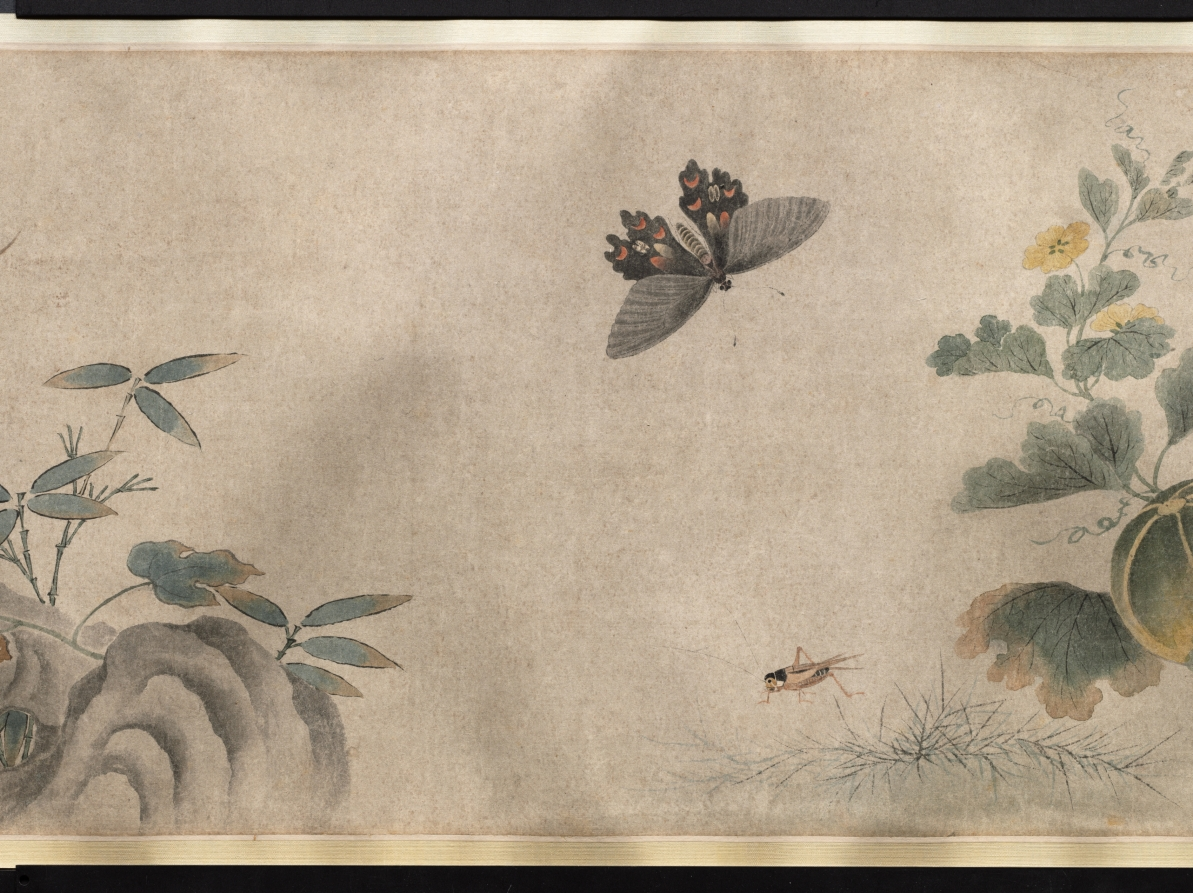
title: Insects and Flowers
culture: China, Qing dynasty (1644-1911) or Republican period (1912-49)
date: c. 1900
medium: Handscroll, ink and color on paper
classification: Painting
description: More than 26 feet long, this scroll presents insects, reptiles, and plants in delicate brushwork and pale colors, referring in style to earlier Southern Song dynasty (1127–1279) bird-and-flower paintings. Upon closer inspection, ants dismember a butterfly and reptiles wait to ambush their prey. An inscription at the end of the painting gives us an idea of its meaning: Attributed to the Qing dynasty scholar Zhang Xigeng (張錫庚, 1801–1861), the inscriber relates the work to an earlier painting by Qian Xuan (錢選, c. 1235–before 1307) and further suggests that the painting may allude to the relentlessness of natural selection. By drawing a parallel to tumultuous episodes in Chinese history, the writer might even hint at the domestic rebellions and the aggression of Western powers against China in his lifetime, particularly the Opium Wars (1839–60).